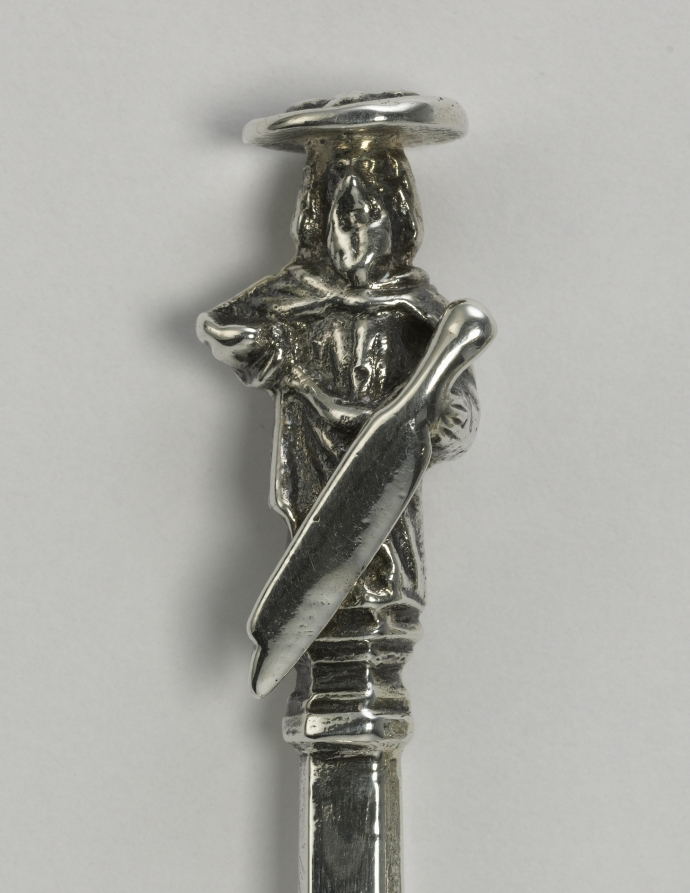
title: Saint Bartholomew Spoon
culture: England, London, 17th century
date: 1622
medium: silver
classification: Silver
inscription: pricked on back of bowl: "R H."